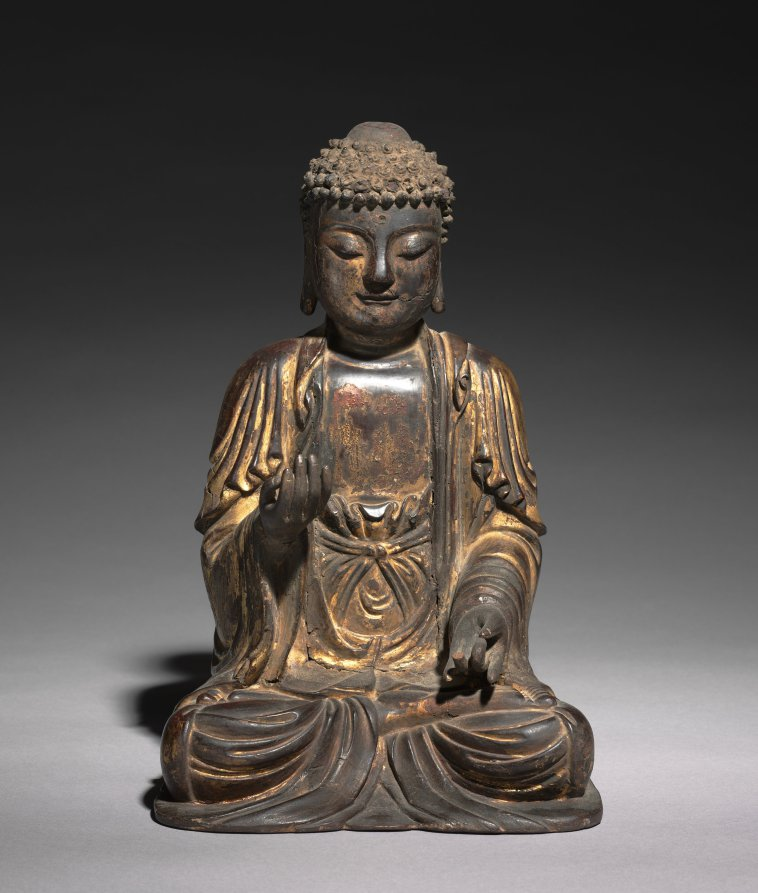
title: Seated Amitabha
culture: Korea, Goryeo dynasty (918–1392)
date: 1300s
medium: wood with lacquer and gilding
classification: Sculpture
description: In Buddhist art, buddhas (supreme beings who entered the world of nirvana) and bodhisattvas (compassionate beings committed to the attainment of enlightenment for others) are two main subjects. The religious role of buddhas and bodhisattvas—to lead all sentient beings to the realm of Buddhahood—is the same, yet visual languages to represent them is different. As shown in this statue, the Buddha is represented as a monk with shaven head and dressed in simple monastic robes. Bodhisattvas, on the other hand, are adorned with elaborate jewelry and a lock of long hair.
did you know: This Buddhist statue was donated to the museum in memory of Godfrey St. G. M. Gompertz (1904-1992), a pioneering scholar and collector of Korean art, in particular in the area of Goryeo-period celadons.